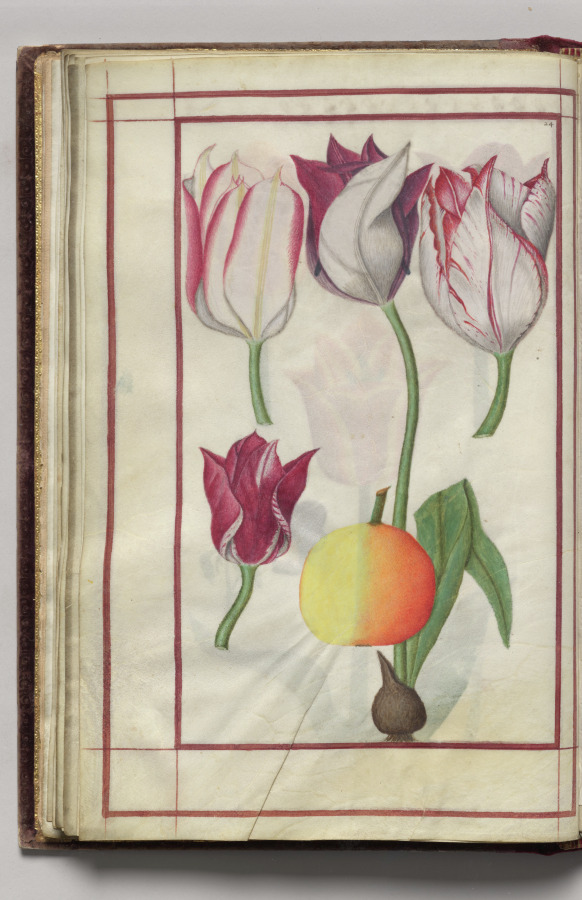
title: Tulips and Fruit, folio 14 (verso), from Florilegium (A Book of Flower Studies)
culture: France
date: 1608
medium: watercolor, ink, silver, and gold over occasional traces of pencil, on vellum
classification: Bound Volume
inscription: Dated: Poitiers 1608 (on frontispiece) Signed: On frontispiece in black ink, lower right: Van Kuyk Notation on drawing: Frontispiece: in pencil, lower margin: * élève de Van Kessel, peintre flammand (* in pencil also appears in front of Van Kuyk's name).